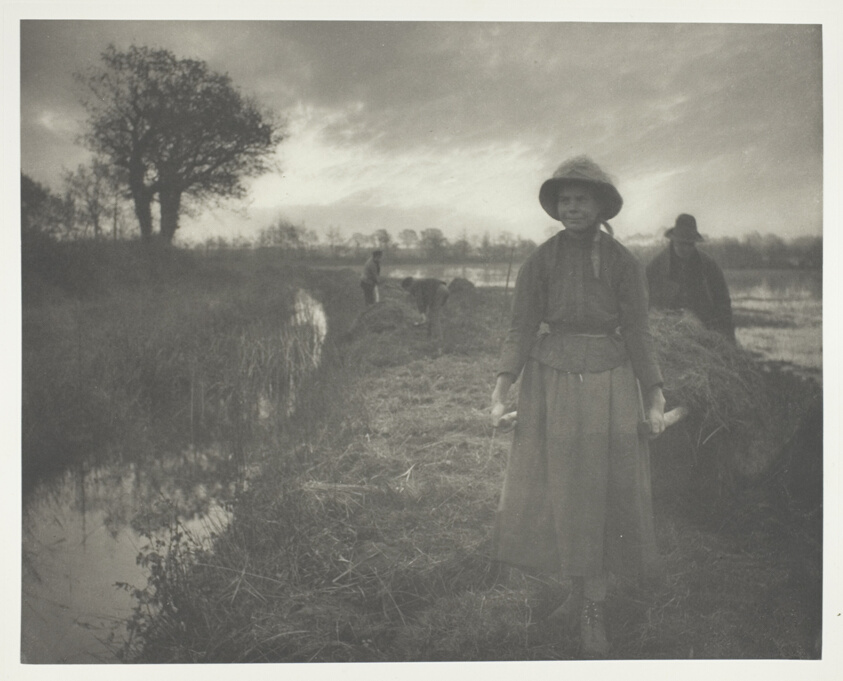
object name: Photograph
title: Poling the Marsh Hay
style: 19th century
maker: Peter Henry Emerson (English, born Cuba, 1856–1936)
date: 1886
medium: Platinum print, pl. XVII from the album "Life and Landscape on the Norfolk Broads" (1886)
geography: England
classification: platinum print; photographic process; photography; photograph